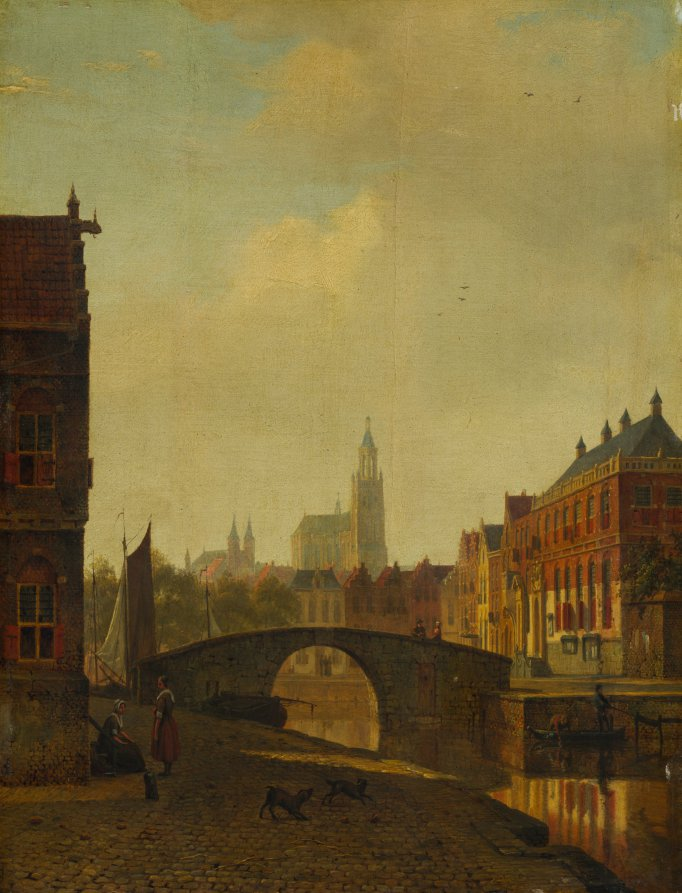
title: Imaginary View of Arnhem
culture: Netherlands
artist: George Andries Roth (Dutch, 1809–1887)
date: late 1830s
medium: oil on wood panel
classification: Painting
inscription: Signed lower right: g. a. roth. [written at an angle at the top of the cornerstones that form the edge of the quay in the lower right foreground]